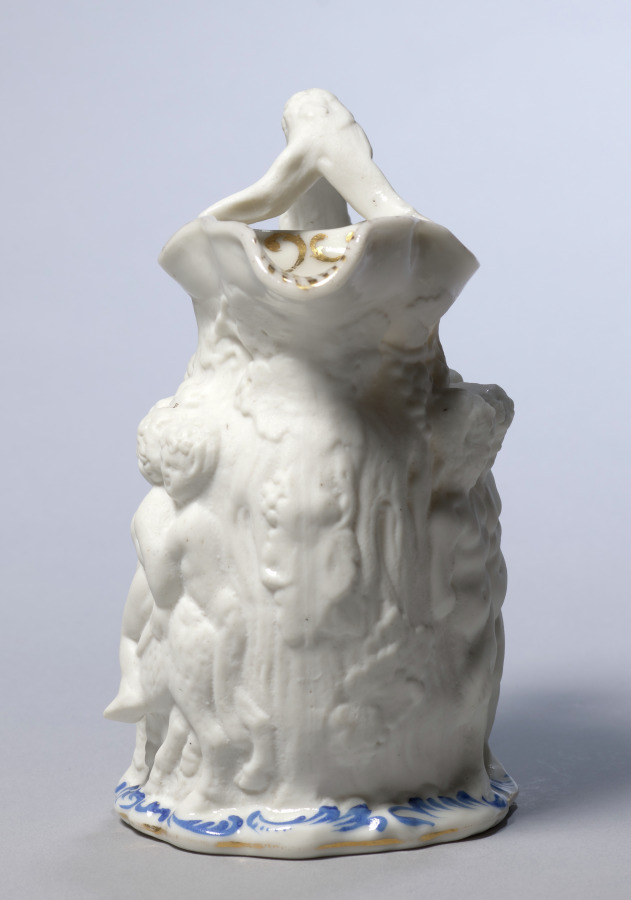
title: Jug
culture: France, 19th century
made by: Jacob Petit (French)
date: 1800s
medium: ceramic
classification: Ceramic